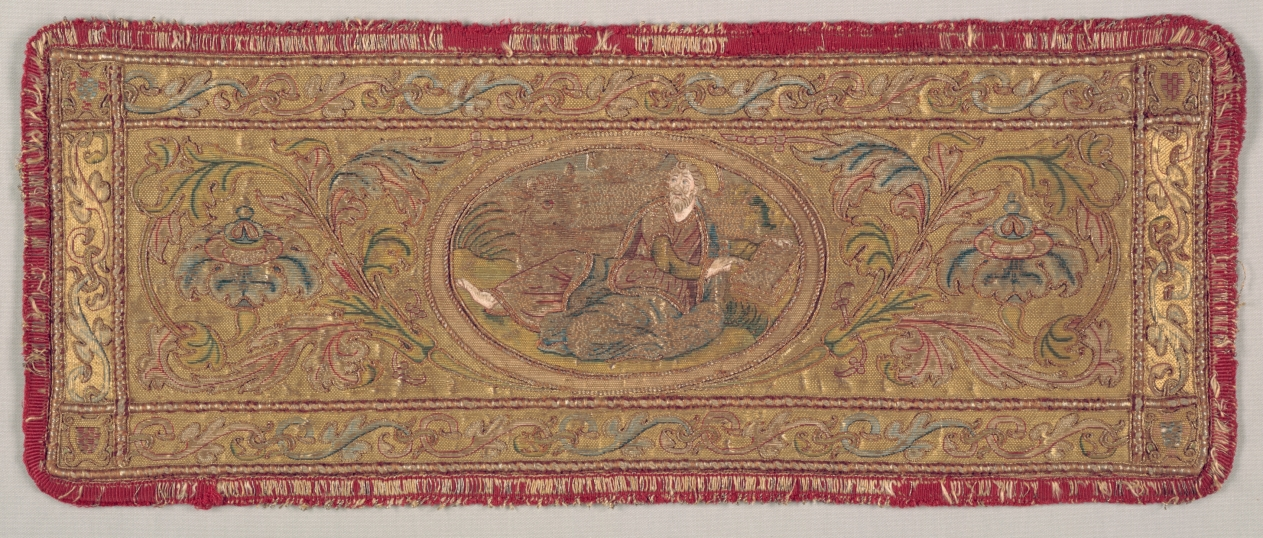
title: Apparel from a Dalmatic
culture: Italy, first half of the 16th century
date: 1500–1550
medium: Plain-weave linen with silk and metal thread embroidery; or nué (shaded gold)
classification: Embroidery